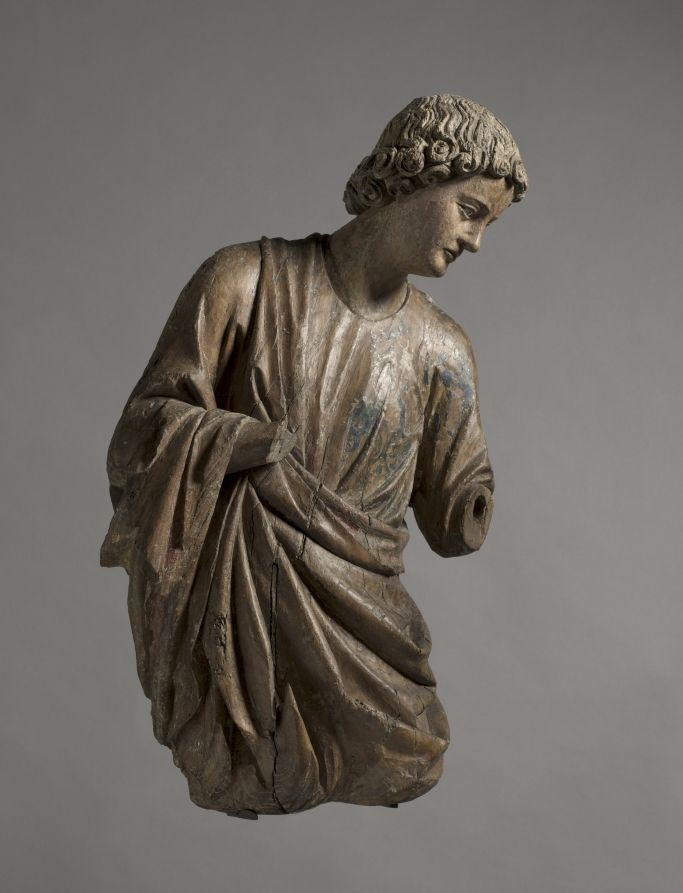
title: Angel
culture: France, vicinity of Reims, 13th century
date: c. 1250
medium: walnut with traces of gilding and polychromy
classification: Sculpture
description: Surviving in fragmentary condition, this pair of angels lacks lower arms, hands, wings, and attributes. Their original paint and gilding, now almost entirely lost, once rendered their garments a rich brocade and their hair a luxuriant gold. Nonetheless, in their graceful poses and sublime faces—which may portray tragic interest, anguish, or deep concern—their original delicacy and power are still evident. They embody the monumental style of 13th-century High Gothic cathedral sculpture in France. Their style specifically suggests they were carved in or around Reims, possibly by sculptors associated with the cathedral there. Their original placement is unknown, but they may have flanked an altar on columns.